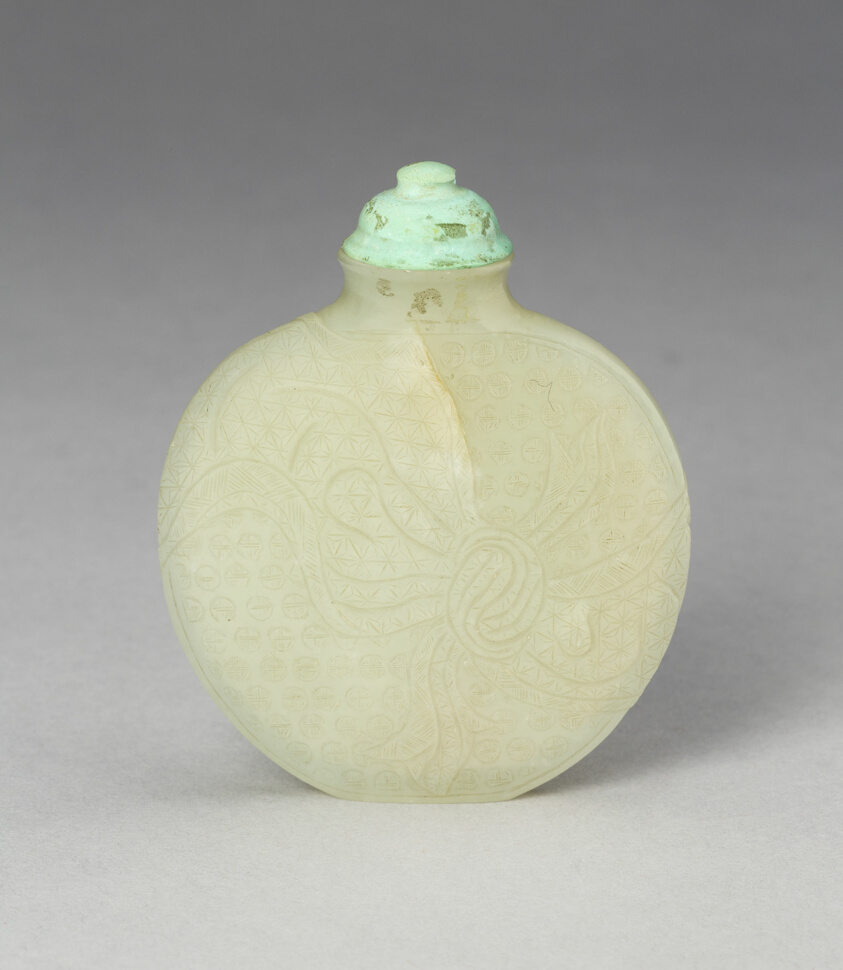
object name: Vessel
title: Snuff Bottle with Tied Ribbons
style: mughal, Indian (South Asian), South Asian, asian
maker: India; Mughal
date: Late 18th century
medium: Jade with carved decoration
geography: India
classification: snuff bottle; american arts; vessel